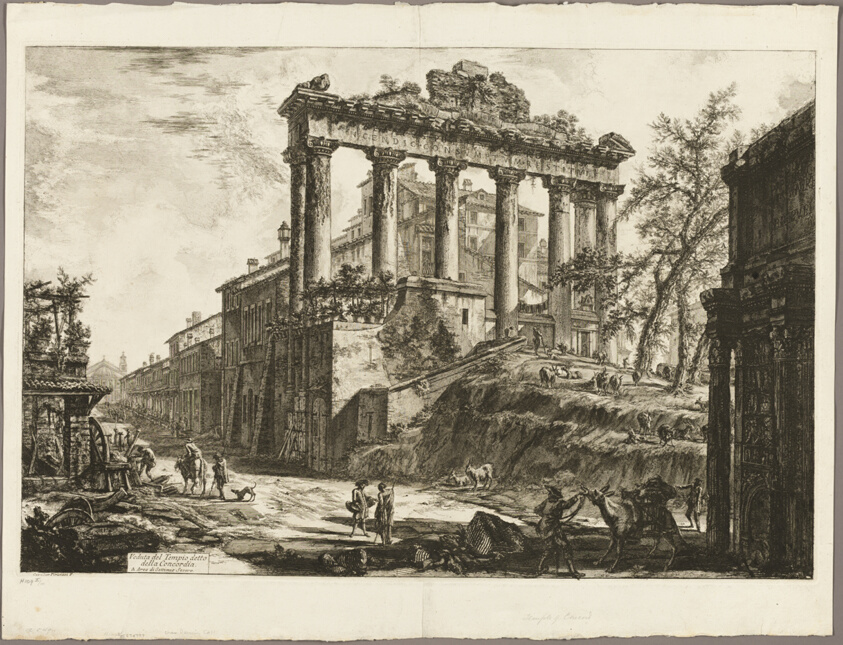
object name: Print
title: View of the So-Called Temple of Concord, from Views of Rome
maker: Giovanni Battista Piranesi (Italian, 1720-1778); published by Francesco (Italian, 1758-1810) and Pietro Piranesi (Italian, born 1758/9)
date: 1774, published 1800–07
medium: Etching on heavy ivory laid paper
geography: Italy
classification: etching; print; prints and drawing